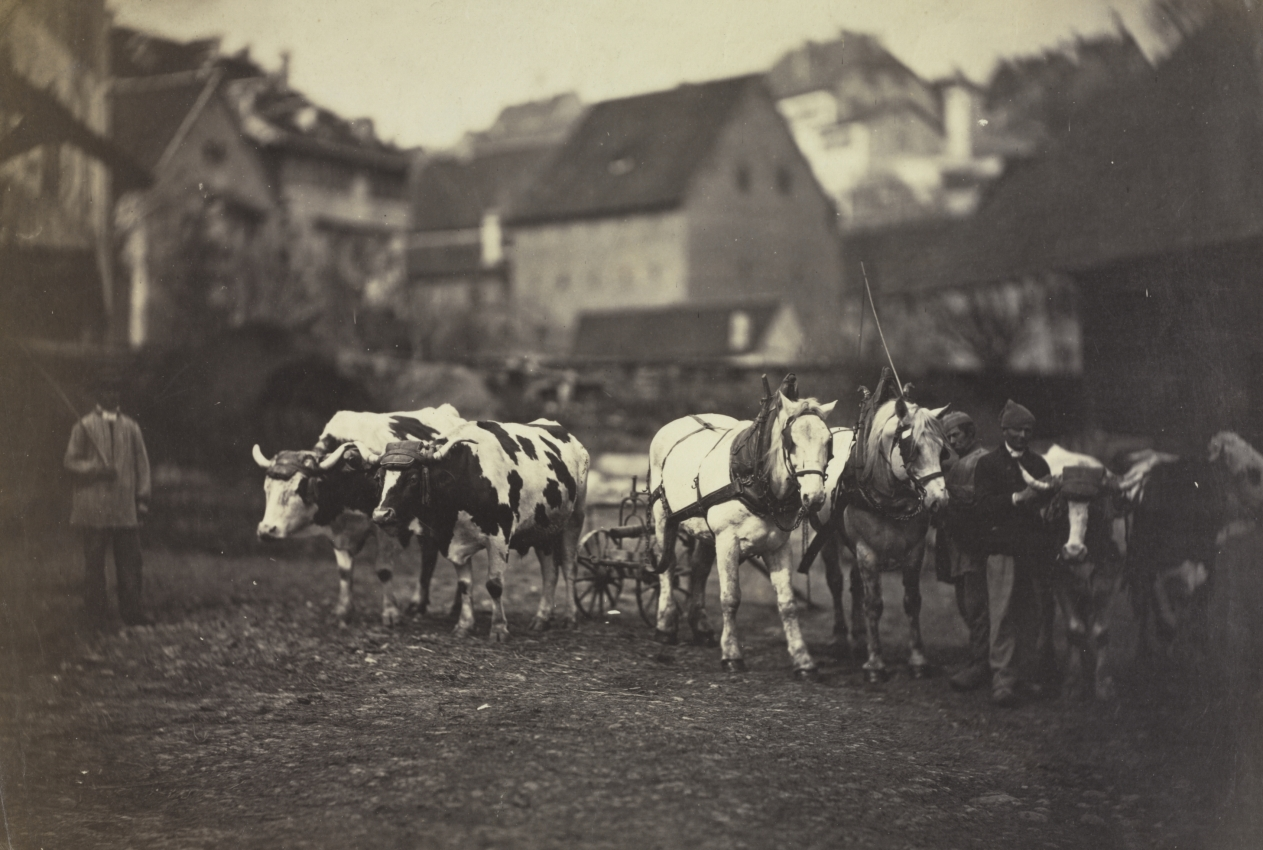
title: Untitled (Farm Animals)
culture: France, 19th century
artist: Adolphe Braun (French, 1812–1877)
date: 1850s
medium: albumen print from wet collodion negative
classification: Photograph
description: Oxen and horses were essential elements of farming; they pulled the plows and other farm equipment, some of which is visible behind the animals. While the animals and farmers are in sharp focus, the buildings are blurred, suggesting that perhaps Adolphe Braun intended to market these photographs to visual artists as models rather than intending them to be hung on people’s walls as a substitute for a painting.